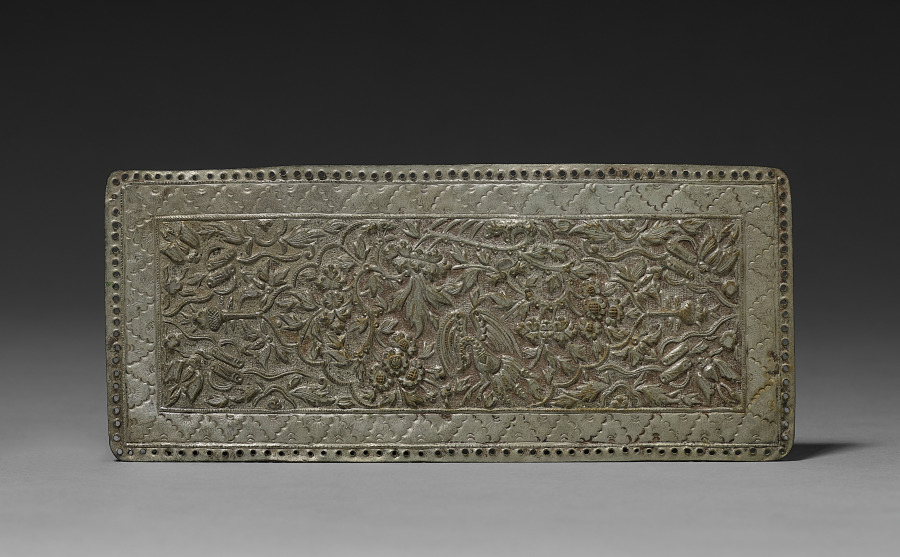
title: Pillow-end Plate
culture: Malaysia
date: 1800s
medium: white metal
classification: Metalwork